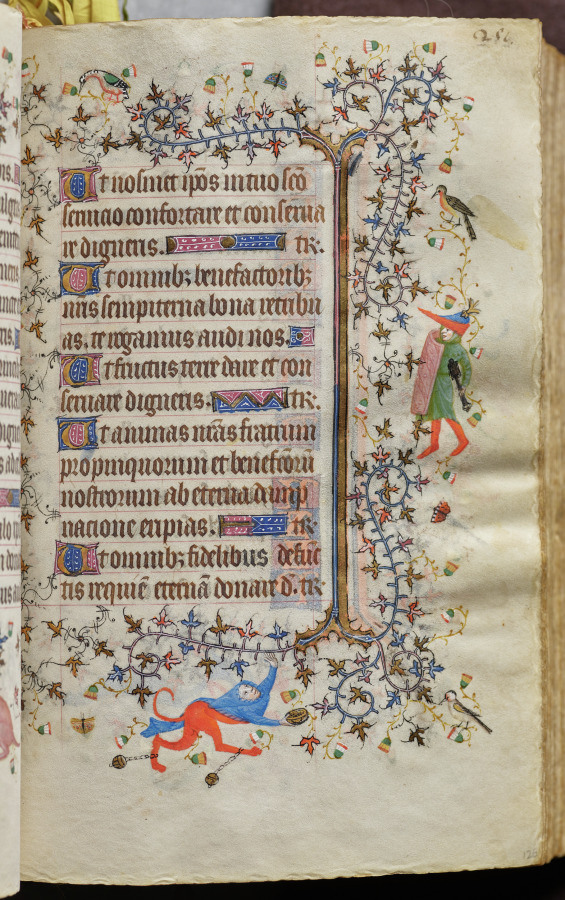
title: Hours of Charles the Noble, King of Navarre (1361-1425): fol. 126r, Text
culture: France, Paris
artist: Master of the Brussels Initials and Associates (French)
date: c. 1405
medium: ink, tempera, and gold on vellum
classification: Bound Volume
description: This precious volume was obviously highly prized by its owner, the French-born King of Navarre, who had his coat of arms painted on no less than twenty folios. Rather than directly commissioning this manuscript from a specific workshop, it seems that Charles the Noble acquired his book of hours -- perhaps ready-made for the luxury market -- while on a trip to Paris in 1404-05. A collaborative effort, six painting styles are evidenced within the pages of this codex, those of two Italians, two Frenchmen, and two Netherlanders. The painter who was responsible for the planning and decoration of the book, and who produced seventeen of the large miniatures, was a Bolognese artist known as the Master of the Brussels Initials. His principal assistant, responsible for most of the borders, was a Florentine who signed his name "Zecho" da Firenze on folio 208 verso.